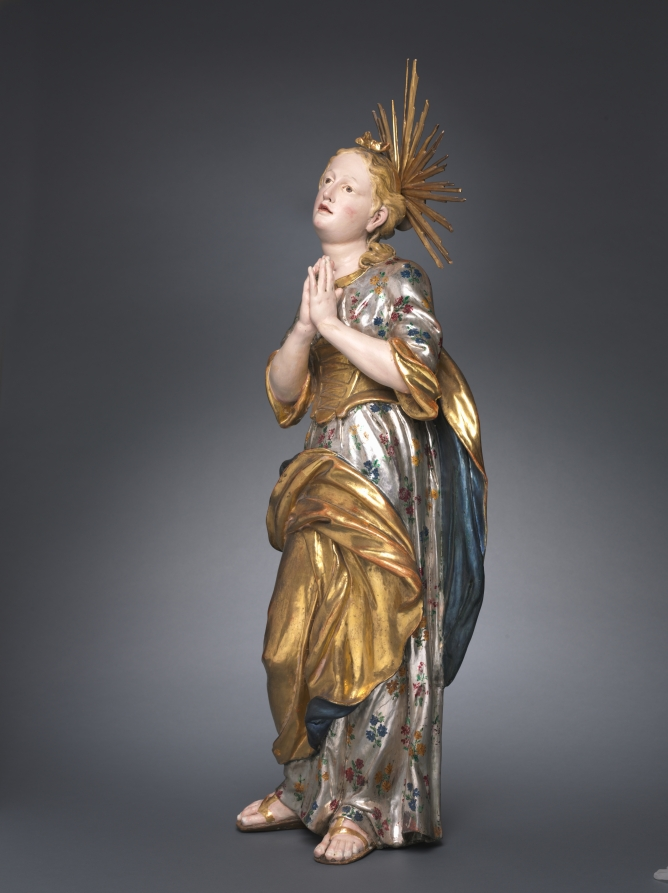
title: Virgin Mary as a Child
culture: Austria, Vienna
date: 1750–75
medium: painted and gilded wood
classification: Sculpture